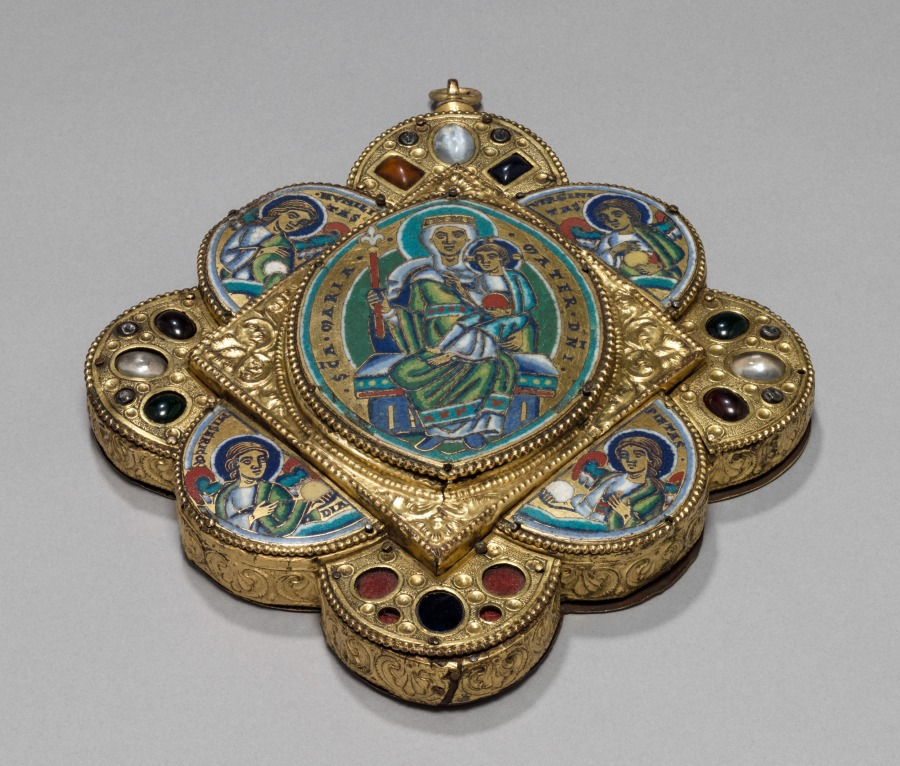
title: Pendant with the Virgin and Child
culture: Mosan, Meuse Valley, Romanesque period, 12th century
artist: circle of Godefroid de Huy (Netherlandish)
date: c. 1160–1170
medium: gilded copper, champlevé enamel; the reverse decorated in vernis brun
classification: Enamel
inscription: S[AN]C[T]A MARIA MATER D[OMI]NI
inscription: HVMILITAS; VIRGINITAS; MISERICORDIA; PIETAS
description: This pendant was made in the Rhine-Meuse region—now in modern Belgium—renowned for the production of fine metalwork objects, especially enamels. An enamel plaque depicting the enthroned Virgin and Christ child dominates the pendant. Four peripheral enamels depict angelic figures representing virtues: Humility, Virginity, Piety, and Mercy, each identified by an inscription. The pendant may have been made to serve as a reliquary to house a consecrated host. The refined craftsmanship and costly materials fittingly honor these sacred remains.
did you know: The outer lobes contain cabochons, gemstones that have been shaped and polished resulting in a rounded top and flat bottom, of garnet, glass, and quartz.